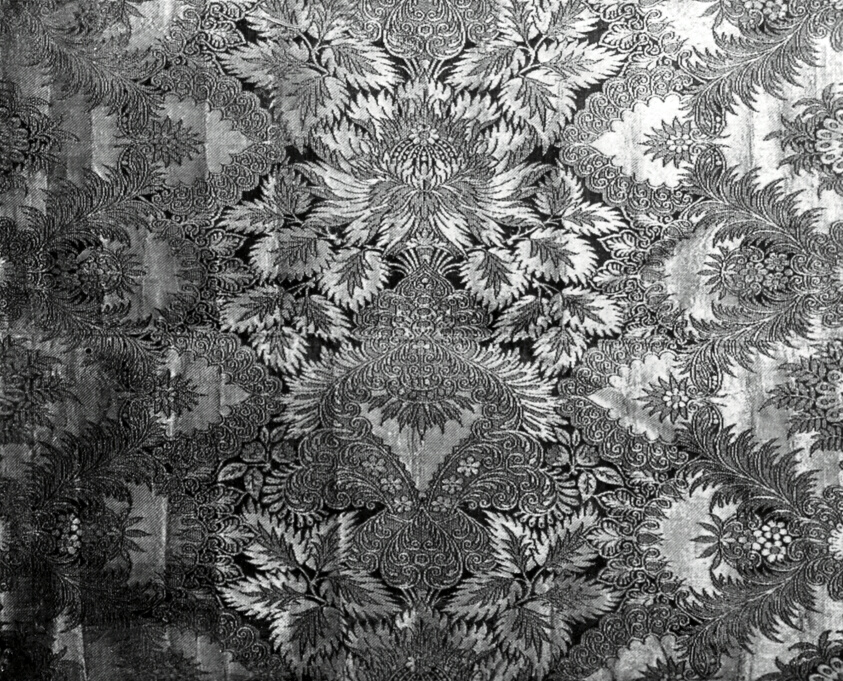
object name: Textile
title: Fragment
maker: Italy or France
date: c. 1860/90 (reproduction of 1720s lace pattern)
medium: Silk, silvered-strip-wrapped-silk, plain weave with supplementary patterning wefts tied by supplementary binding warps in weft-float faced twill interlacings (woven on loom with Jacquard attachment); two selvages present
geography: Italy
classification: textile; weaving